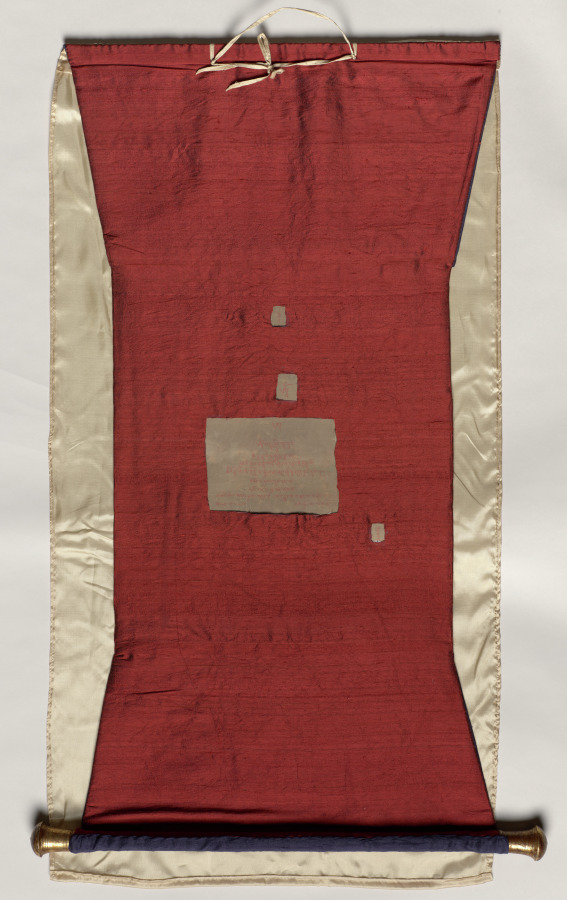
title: Green Tara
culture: Central Tibet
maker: attributed to Aniko (Nepalese, active in Tibet mid- to late 1200s)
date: c. 1260s; mounted, 2020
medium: thangka; gum tempera, ink, and gold on sized cotton; mount: silk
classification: Painting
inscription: Om Ah Hum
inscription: om tare tutare ture svaha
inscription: Om Ah Hum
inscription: Om Ah Hum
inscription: om ah sarva vyida svaha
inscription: ye dharmā hetuprabhavā he- tuṃ teṣāṃ tathāgato hy avadat teṣāṃ ca yo nirodha evaṃvādī mahāśramaṇaḥ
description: For Tibetans, Green Tara is one of the preeminent figures of their Buddhist faith, a radiant savioress who embodies the female form of the perfect, enlightened mind. The Green Tara in the Cleveland thangka—a Tibetan devotional painting on cloth—specifically dispels fear and provides protection, just like her mantra inscribed on the back side of the painting. Her green color and fear-not gesture link her to the cosmic Buddha of the North, enshrined above her head. Most scholars agree that this work was painted by the celebrated Nepalese artist known as Aniko.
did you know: The tiny monastic figure under Green Tara's right hand commissioned the painting.